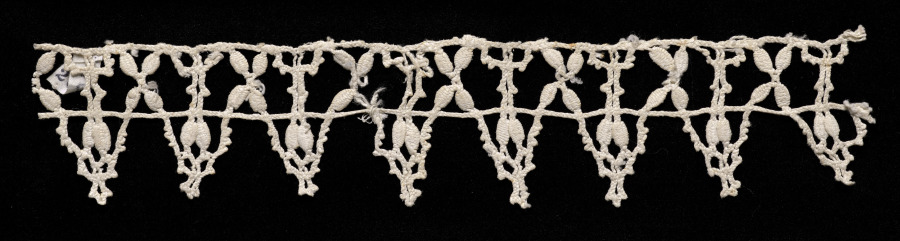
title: Lace Edging of Points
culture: Italy, Venice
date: 1550–99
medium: Bobbin lace (needle lace, reticella design)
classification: Lace